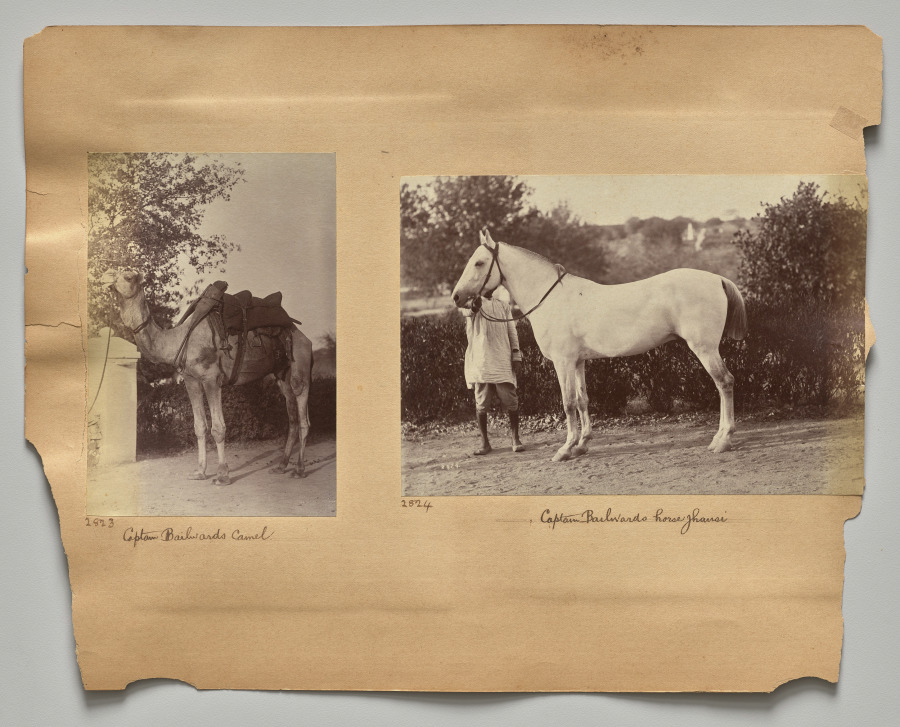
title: Captain Bailward's horse, Jhansi (verso, right)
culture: India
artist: Raja Deen Dayal (Indian, 1844–1905)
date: c. 1882–87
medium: albumen print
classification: Photograph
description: These photographs are part of an album, now disassembled, of around 105 photographs taken in India between 1885 and summer 1887 that provide glimpses into the lives of the British colonial elite and royal and upper-class Indians. The museum holds another group of 37 pictures from this album (2016.266), which was probably commissioned by a British civil servant visiting or working in India around 1888 as a personal souvenir of his experiences there.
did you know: Raja Deen Dayal is regarded now, and was considered during his lifetime, to be India’s most important 19th-century photographer.